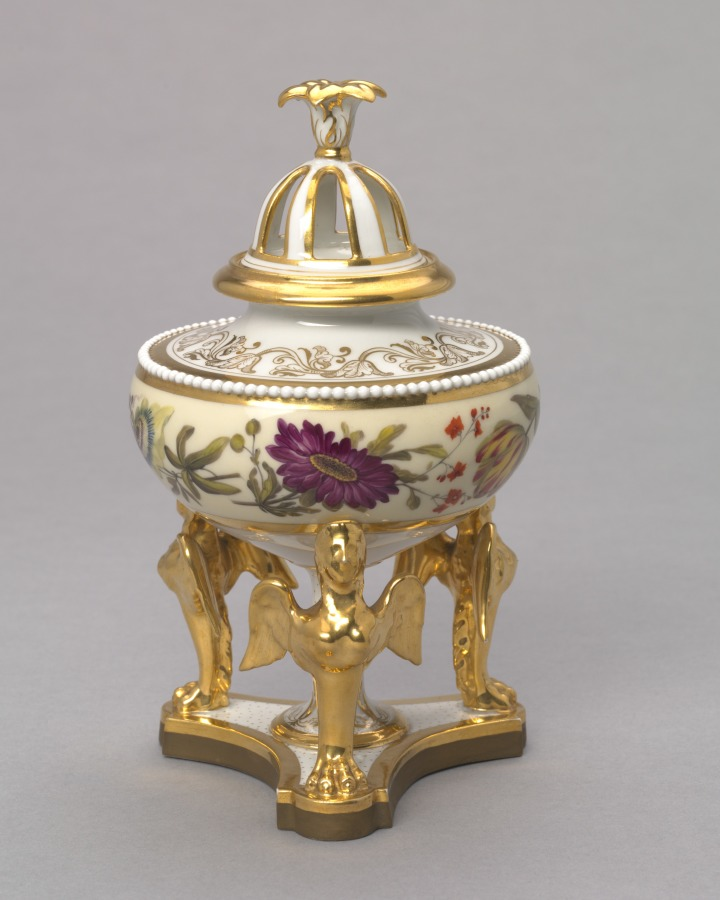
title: Pair of Urns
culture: England, Worcester, 19th century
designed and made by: Flight, Barr and Barr (British)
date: c. 1815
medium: artificial porcelain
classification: Ceramic